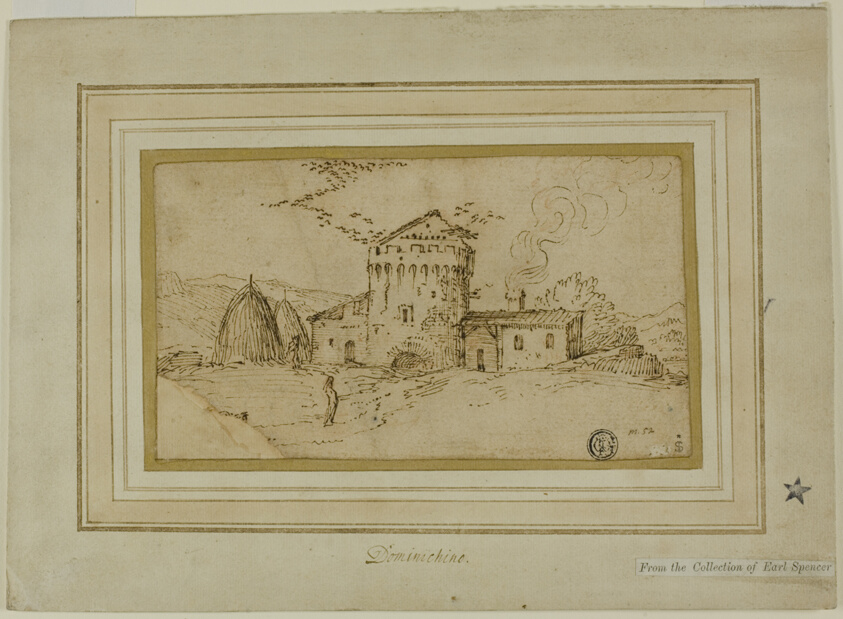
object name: Drawing and Watercolor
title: Farm with Tower and Haystacks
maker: Follower of Domenichino; Italian, 1581-1641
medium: Pen and brown ink, over traces of red chalk, on tan laid paper, laid down on ivory laid paper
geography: Italy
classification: pen and ink drawings; drawings (visual works); prints and drawing